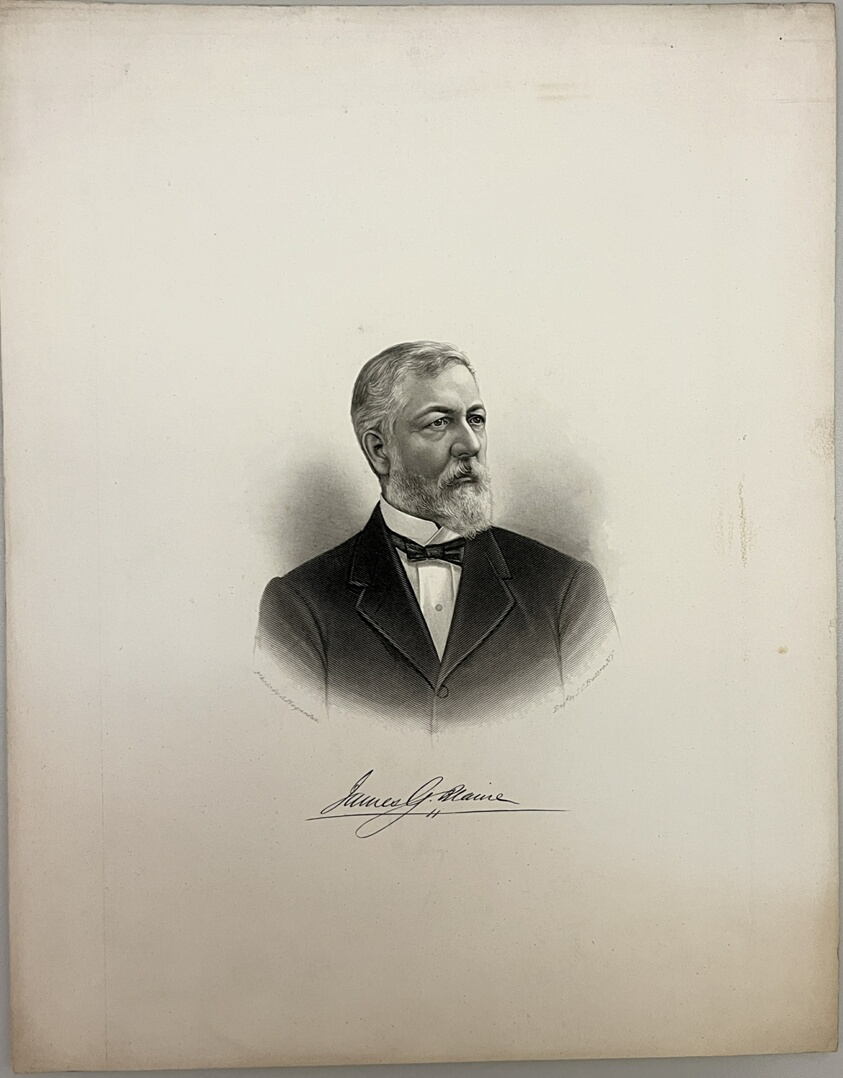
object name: Print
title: James G. Blaine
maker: John Chester Buttre (American, 1821-1893); after Abraham Bogardus (American, 1822-1908)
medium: Steel engraving on paper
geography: United States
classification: reproduction; print; prints and drawing